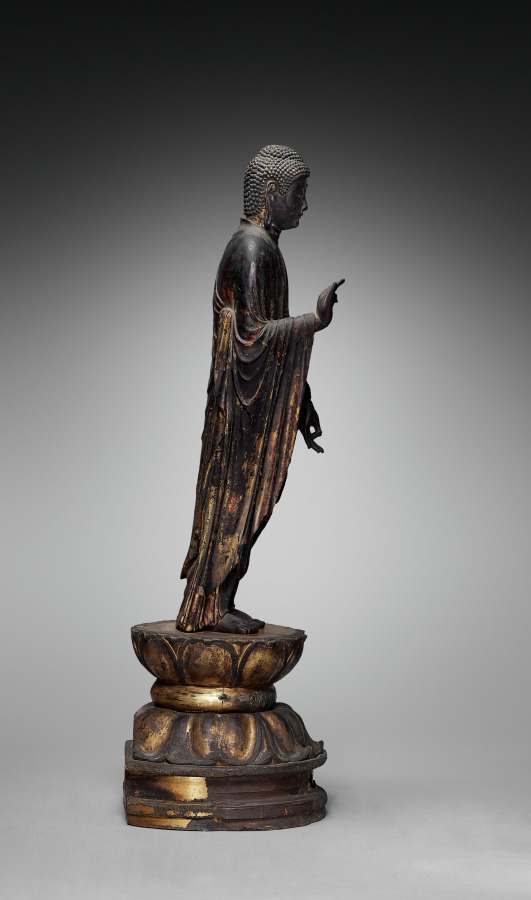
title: Amida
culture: Japan, Kamakura period (1185–1333)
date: 1200s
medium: Wood with lacquer and gilding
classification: Sculpture